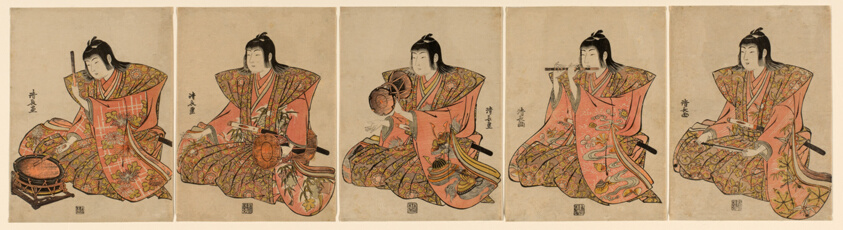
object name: Print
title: Five Musicians (Gonin bayashi)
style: Japanese (culture or style)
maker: Torii Kiyonaga (Japanese, 1752-1815)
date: c. 1783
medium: Color woodblock print; chuban pentaptych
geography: Japan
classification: woodblock print; print; asian art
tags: music